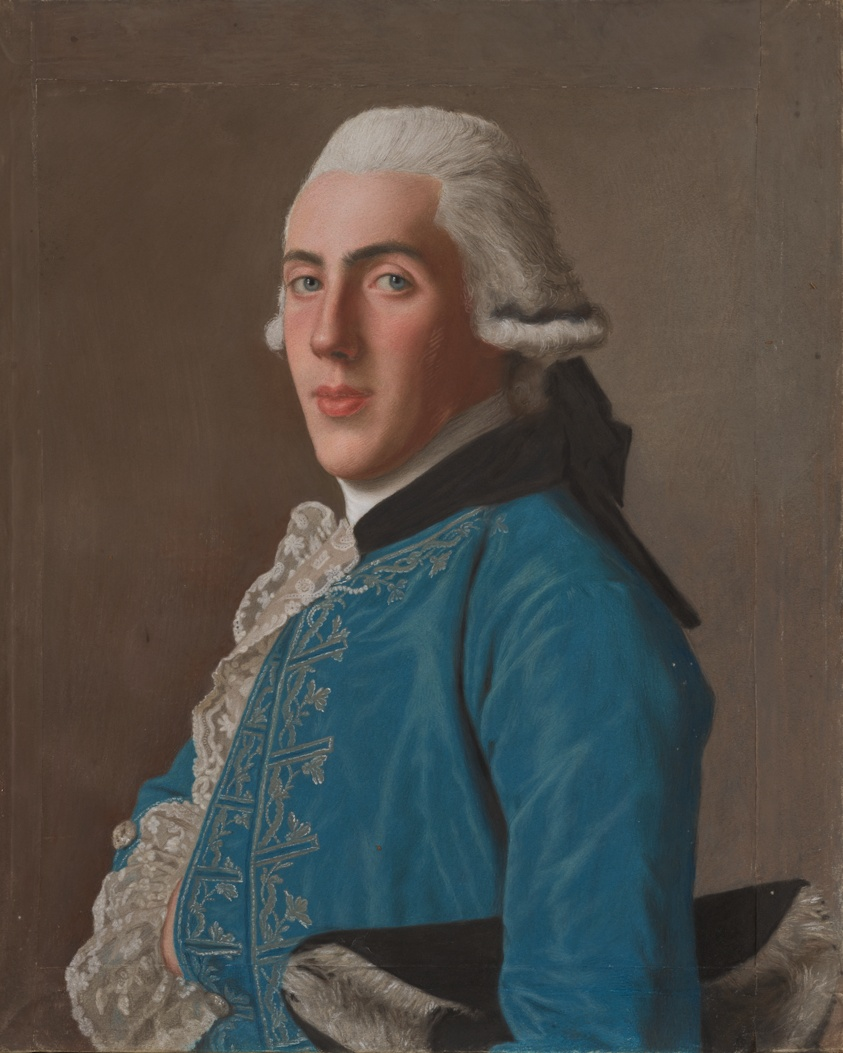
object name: Drawing and Watercolor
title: James Milliken Jr.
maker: Jean-Étienne Liotard; Swiss, 1702–1789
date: c. 1761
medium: Pastel on parchment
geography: Switzerland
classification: prints and drawing; drawing; pastel